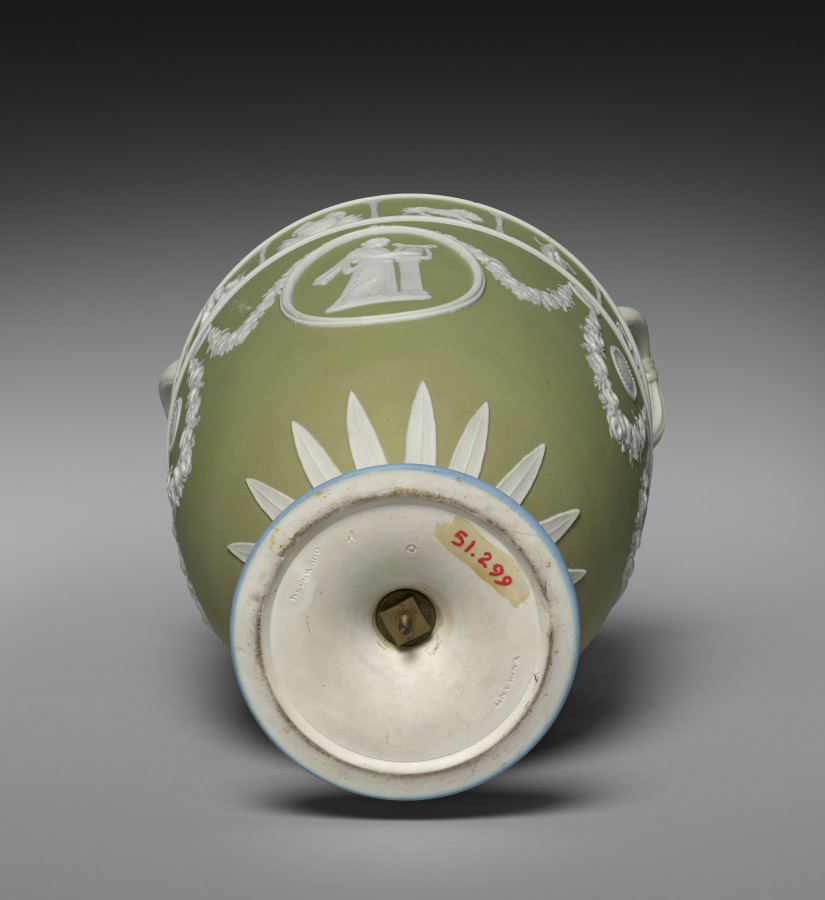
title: Vase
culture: England, Staffordshire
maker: Josiah Wedgwood and Sons (British, Staffordshire, est. 1759)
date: c. 1850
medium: jasper ware with relief decoration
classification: Ceramic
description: Wedgwood's tricolor jasperware first became popular in the 1770s during a period of fascination with neoclassical decoration. This vase was probably made around 1850 during the period when this type of decoration was revived. The relief medallions depict two versions of the Greek god Apollo, the god of music, next to his harp or lyre.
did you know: See cover record.